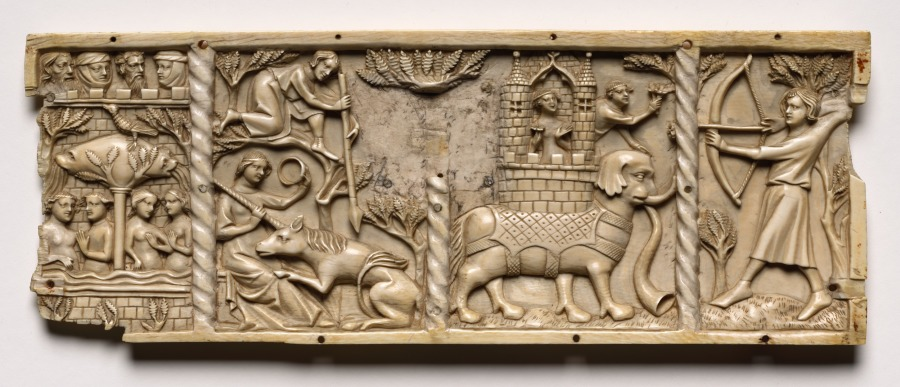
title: Panel from a Casket with Scenes from Courtly Romances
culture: France, Lorraine?, Gothic period, 14th century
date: 1330–1350 or later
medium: ivory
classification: Ivory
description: Among the most lavish and deluxe products of French ivory workshops of the 1300s were large caskets carved with elaborate scenes drawn from courtly romances. The panel shown here comes from such a casket. This side panel depicts scenes such as the fountain of youth and the unicorn hunt. These images suggesting chivalry, fertility, virginity, youth, and an idealized courtly love likely derive from manuscripts including the Roman de la Rose and the poems of Chrétien de Troyes. Such texts were often found within the libraries of the aristocracy, so the casket’s symbolic images would have been readily understood. Such caskets may have originally been gifts between a man and a woman. The expense of the material, ivory, suggests they were produced for an elite, aristocratic clientele.